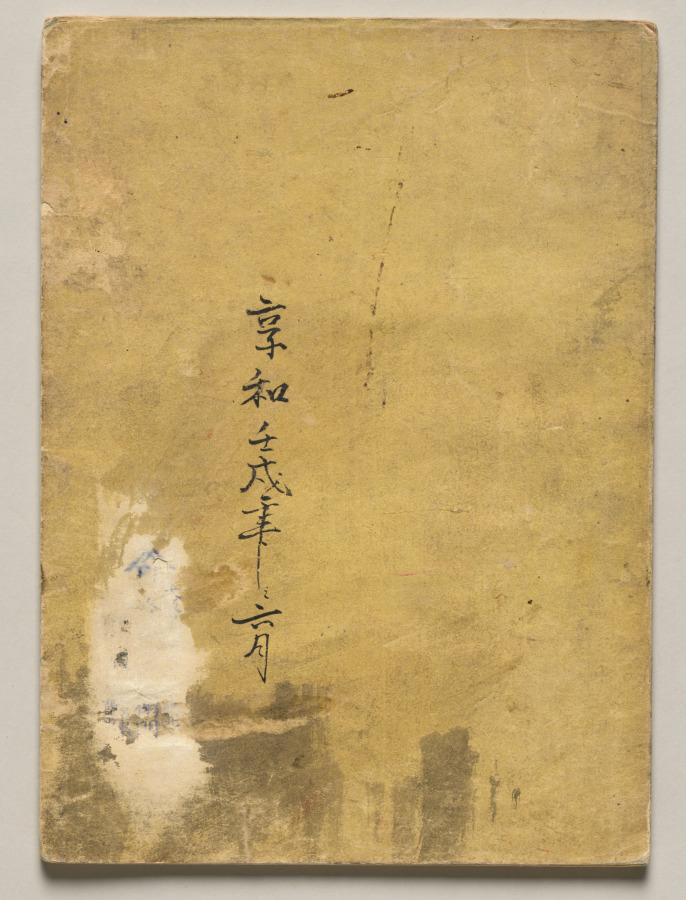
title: The Kōrin Picture Book (Volume 1)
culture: Japan, Edo period (1615–1868)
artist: Nakamura Hōchū (Japanese, d. 1819)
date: 1800s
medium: one of a set of two woodblock printed folding-books; ink and color on paper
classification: Bound Volume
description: Ogata Korin (1658-1716) was one of the most admired artists of Rimpa, or "decorative school painting." These books by the charming later-generation Rimpa artist Hochu record Korin's inventive designs.